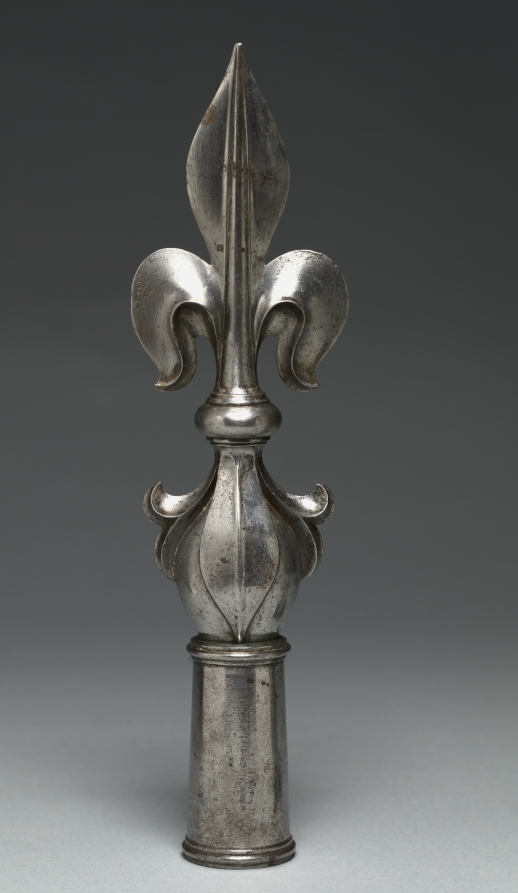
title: Banner Head in the Form of a Fleur-de-lys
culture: France, 18th century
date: 1700s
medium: steel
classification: Arms and Armor